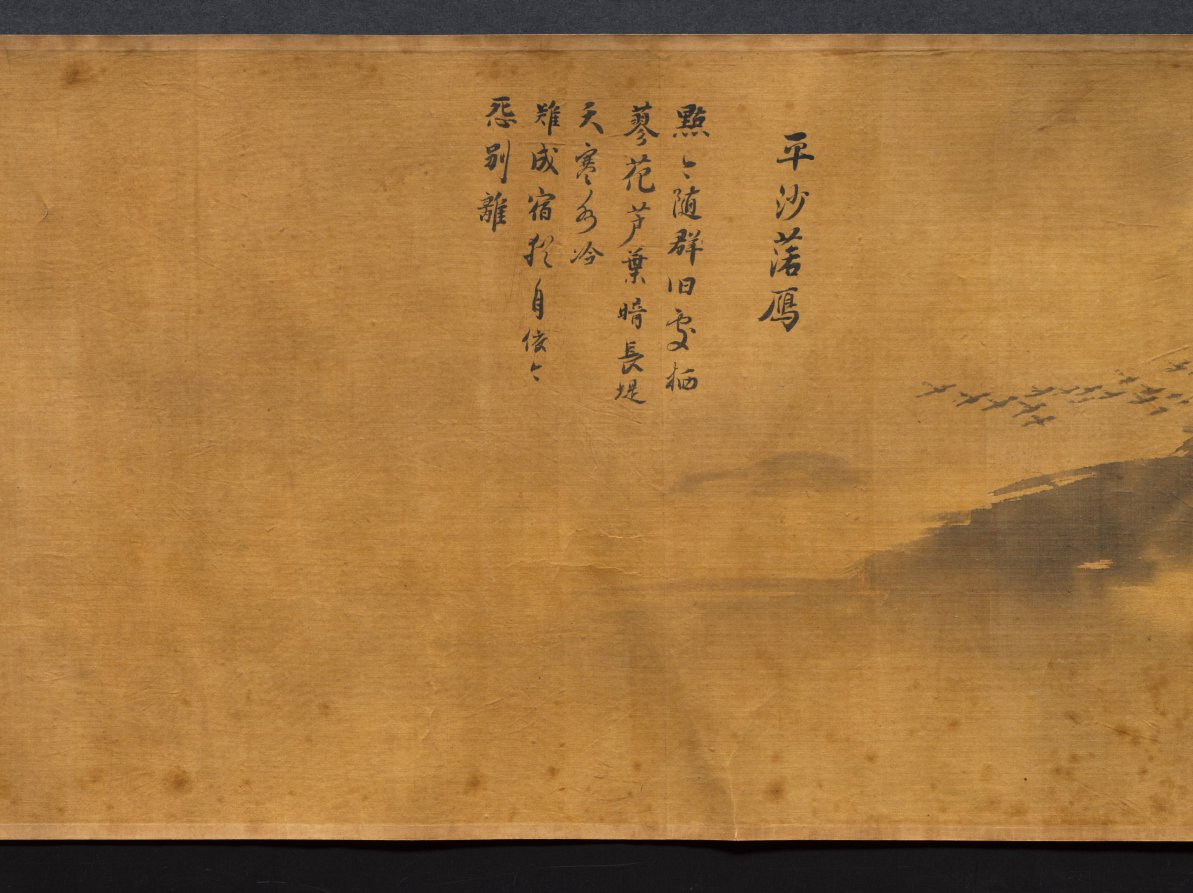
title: Eight Views of Xiao-Xiang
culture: Japan, Edo period (1615–1868)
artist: Kano Tan’yū (Japanese, 1602–1674)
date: 1615–1868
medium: handscroll; ink on silk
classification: Painting